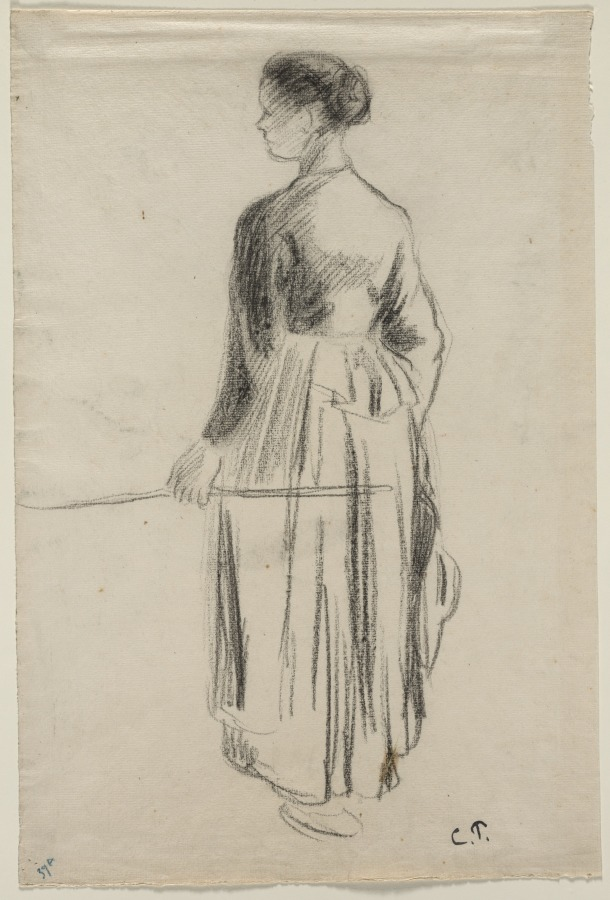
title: The Cowherdess, Eragny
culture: France, 19th century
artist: Camille Pissarro (French, 1830–1903)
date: 1886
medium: crayon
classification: Drawing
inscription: lower left, in blue crayon: 39A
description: This drawing of a peasant girl seen from the back with her bodice cinched at the waist was a study for a figure who appeared in an oil painting, Vachère à Eragny, 1886, and later in a watercolor of a fan painted in 1890. In a letter to his son, Pissarro mentioned being particularly pleased with the figure.